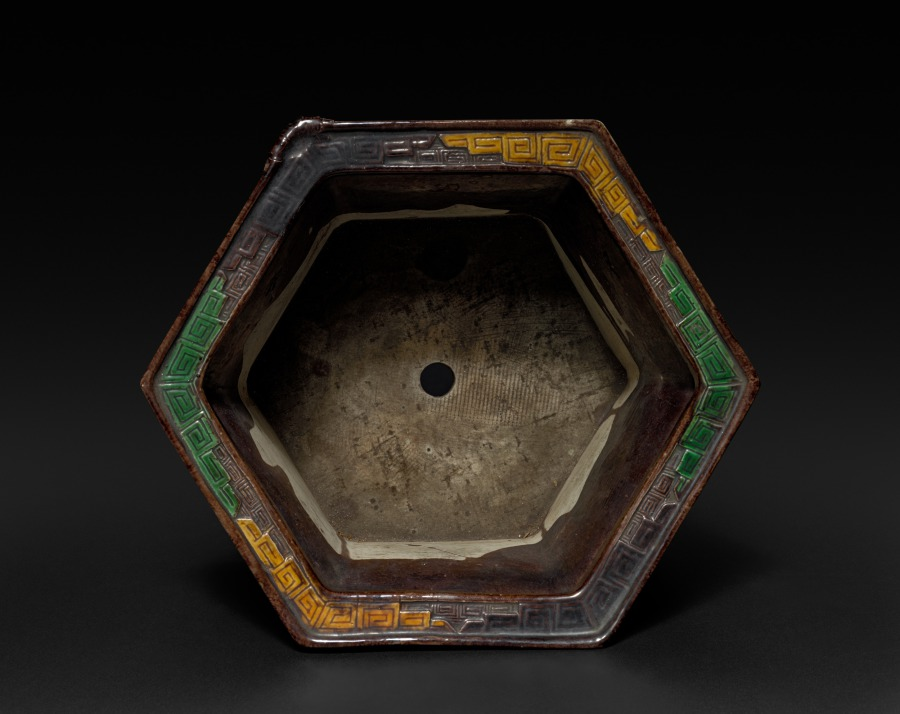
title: Cachepot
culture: China, Qing dynasty (1644-1911), Kangxi reign (1661-1722)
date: 1662–1722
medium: porcelain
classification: Ceramic